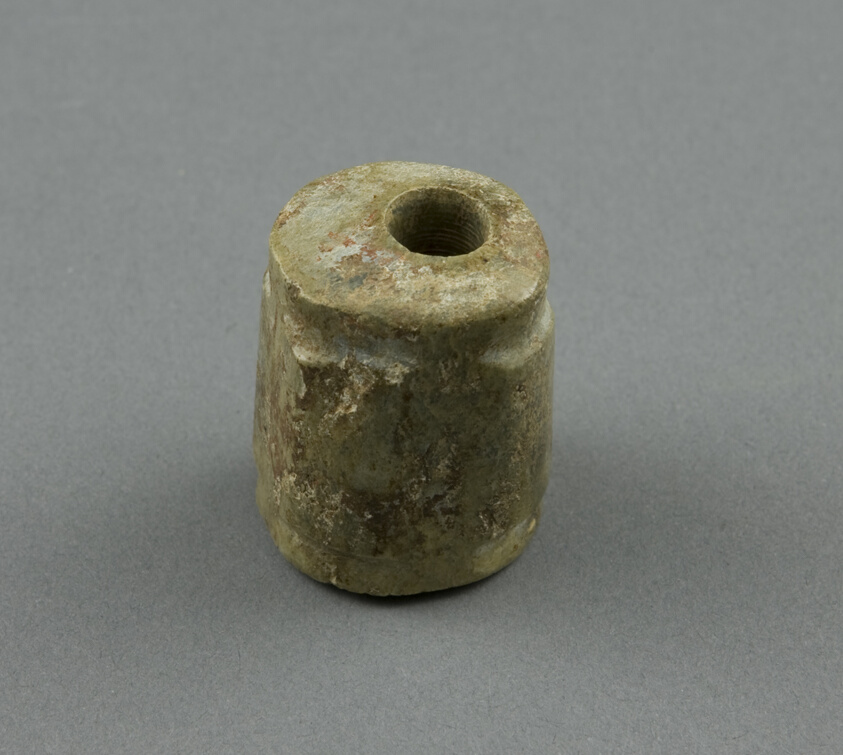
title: Bead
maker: China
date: Early Western Zhou dynasty (1047BC-772BC)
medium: Jade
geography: China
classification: jade; asian art